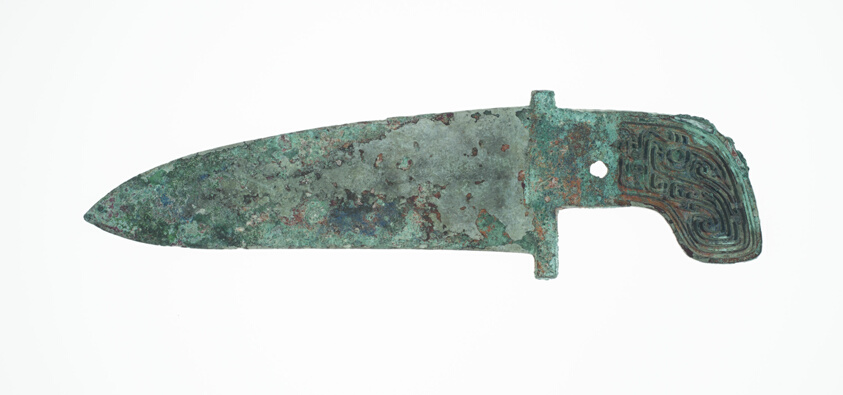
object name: Vessel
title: Dagger-Axe (ge)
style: Chinese (culture or style)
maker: China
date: Shang dynasty (1600 – 1046 B.C.)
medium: Bronze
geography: China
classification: bronze; metal; weapon; asian art; vessel